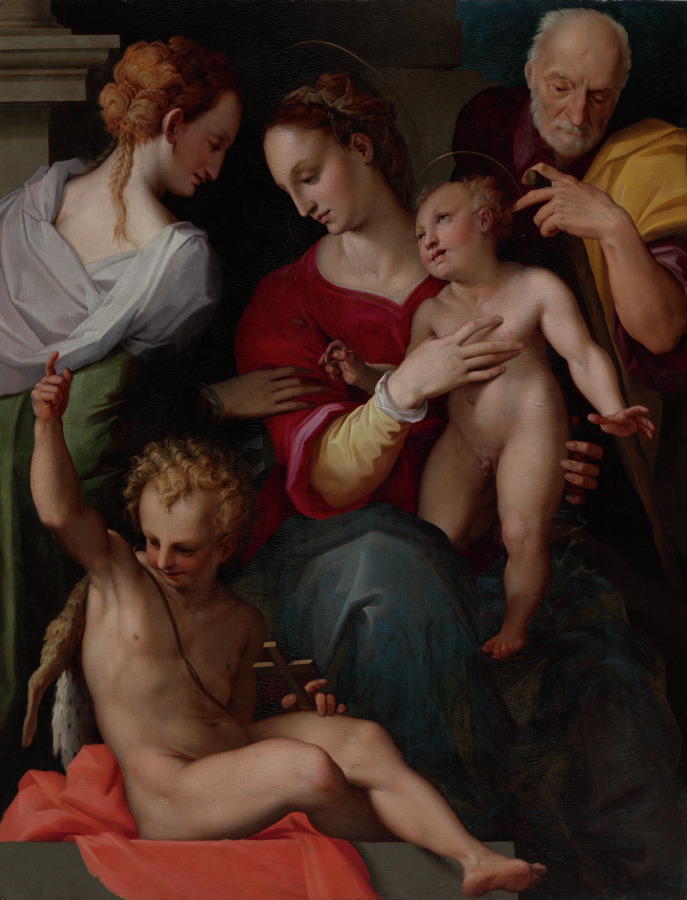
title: Holy Family with the Mystic Marriage of Saint Catherine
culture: Italy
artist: Tommaso d’Antonio Manzuoli, called Maso da San Friano (Italian, 1531–1571)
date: c. 1560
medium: oil on panel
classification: Painting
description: The marriage shown in this painting is called “mystic” because it was a purely symbolic. The infant Jesus places a ring on the finger of Catherine of Alexandria, a fourth-century saint who had a vision of dedicating herself to God and remaining a virgin instead of marrying. Note the otherworldly quality of the women and children’s elegant faces, compared to the naturalism of elderly Saint Joseph, who may be a likeness of someone the artist knew.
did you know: Saint Catherine is usually shown with a spiked wheel; here, it is barely visible below her hand.